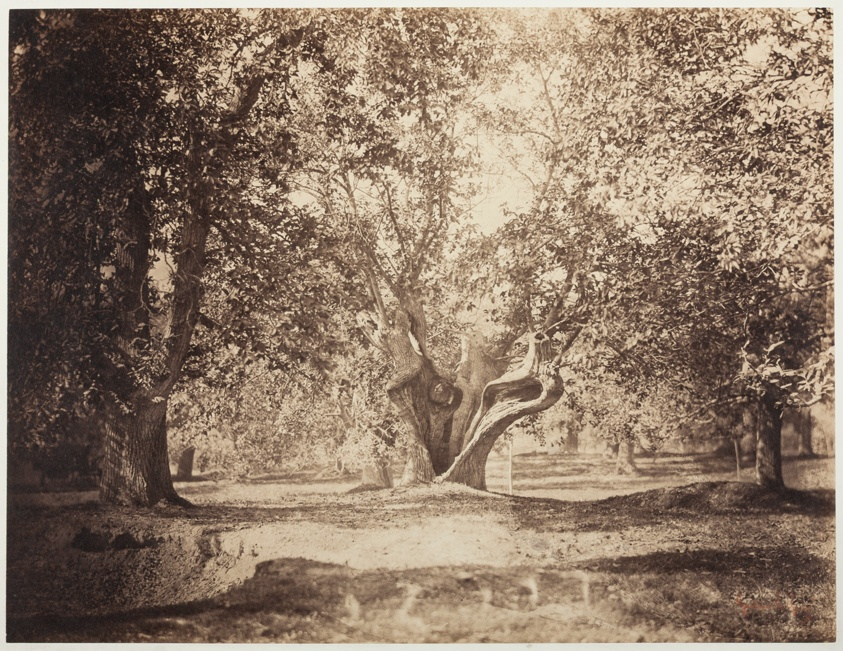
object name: Photograph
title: Tree, Forest of Fontainebleau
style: 19th century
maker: Gustave Le Gray (French, 1820–1884)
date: c. 1856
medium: Albumen print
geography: France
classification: albumen silver print; photographic process; photography; photograph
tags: Paris, traditional landscapes, photography, landscapes